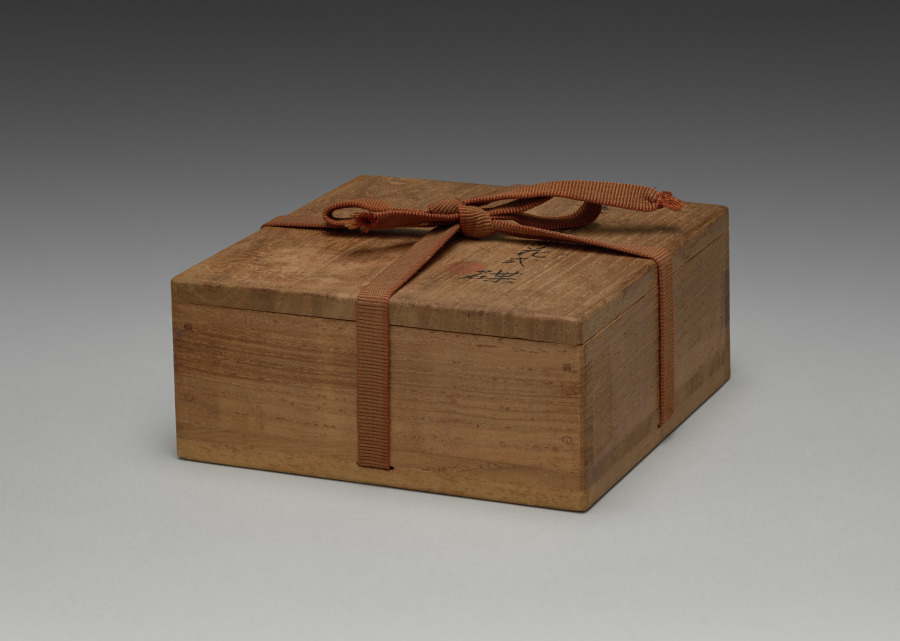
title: Chrysanthemum-Shaped Dish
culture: Japan, Taishō period (1912–26)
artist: Seifū Yohei IV (Japanese, 1872–1951)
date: 1914–46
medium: Porcelain with yellow glaze and molded decoration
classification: Ceramic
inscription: 清風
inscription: 清風造 【印】 清風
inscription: 【印】 清風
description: Like his father, Yohei IV also produced works with red or yellow monochrome glazes. His yellow-glazed works include this sweets bowl molded into the shape of a chrysanthemum, a set of five drinking cups CMA 2022.217, and a pair of sake pourers CMA 2022.216.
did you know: Seifū Yohei IV won a gold medal at the 1915 Panama-Pacific International Exposition in San Francisco for his ceramics.